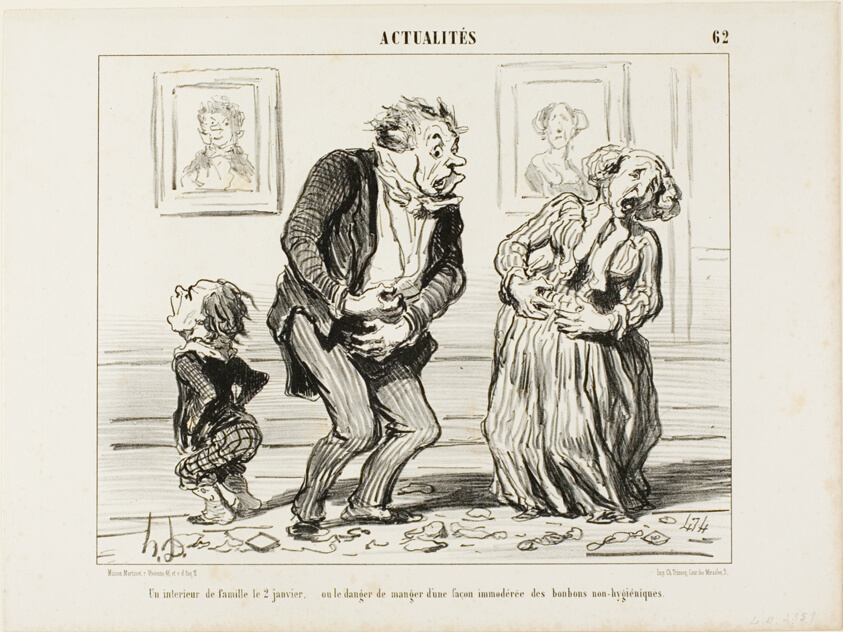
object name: Print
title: The Interior of a Family on January 2 - or the Danger of Consuming Immoderately Non-Hygienic Sweets, plate 62 from Actualités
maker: Honoré Victorin Daumier; French, 1808-1879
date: 1853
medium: Lithograph in black on white wove paper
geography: France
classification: lithograph; print; prints and drawing